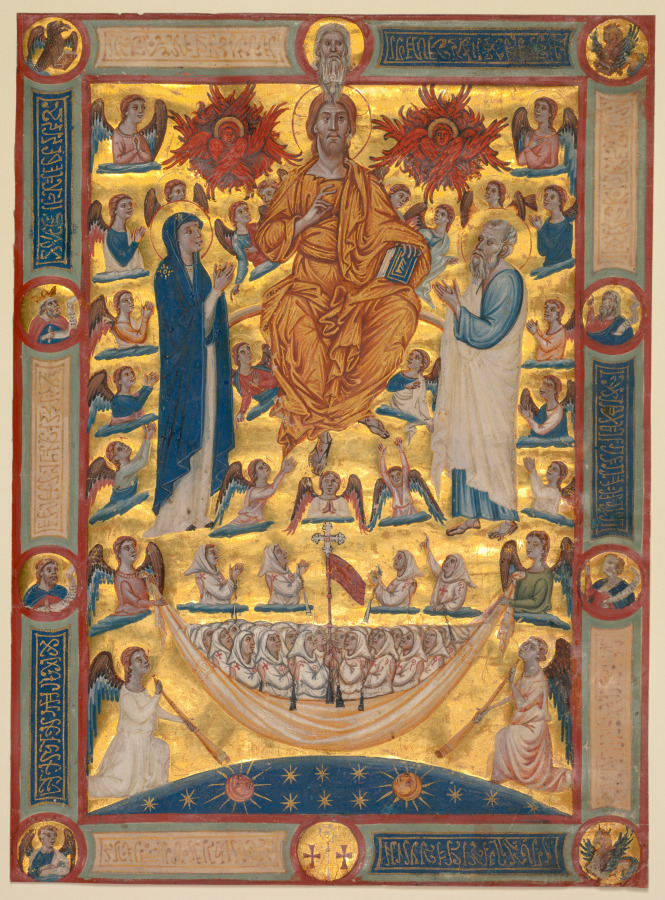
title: Christ in Majesty with the Virgin and Saint John the Evangelist: Single Leaf from a Book of Rules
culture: Italy, Venice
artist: circle of Master of the Washington Coronation (Italian, active c. 1300–30)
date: c. 1310–20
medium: ink, tempera, and gold on parchment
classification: Manuscript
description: In this complex image, the Virgin and St. John stand next to Christ at the Last Judgment as the final trumpets blow. Assembled below are members of the Confraternity of St. John the Evangelist in Venice, robed in white with the insignia of their order: a pastoral staff and crosses. This beautiful page comes from a mariegola, or the book of rules of this confraternity. During the late Middle Ages, every town had one or more confraternities, organizations of lay people who undertook to carry out the ideals of the Franciscans and Dominicans. Confraternities were created for the special veneration of a saint or the Holy Sacrament (the body and blood of Christ). One of their tasks was to strengthen the faith of their members.